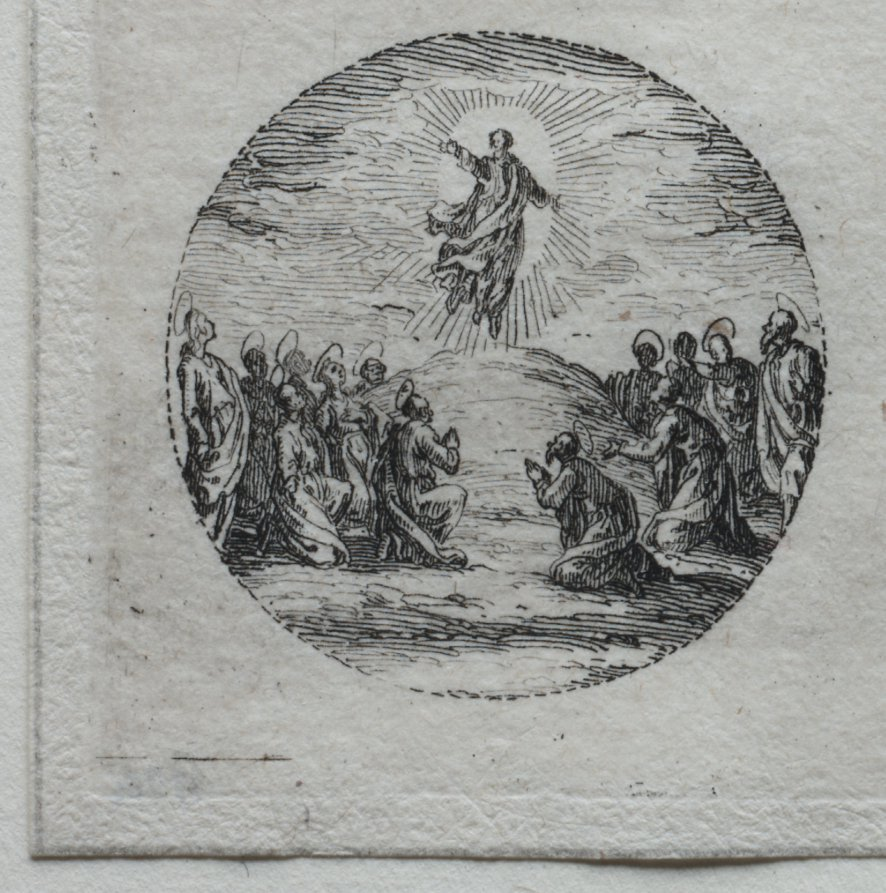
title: The Mysteries of the Passion: The Resurrection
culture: France, 17th century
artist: Jacques Callot (French, 1592–1635)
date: 1631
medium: etching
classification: Print